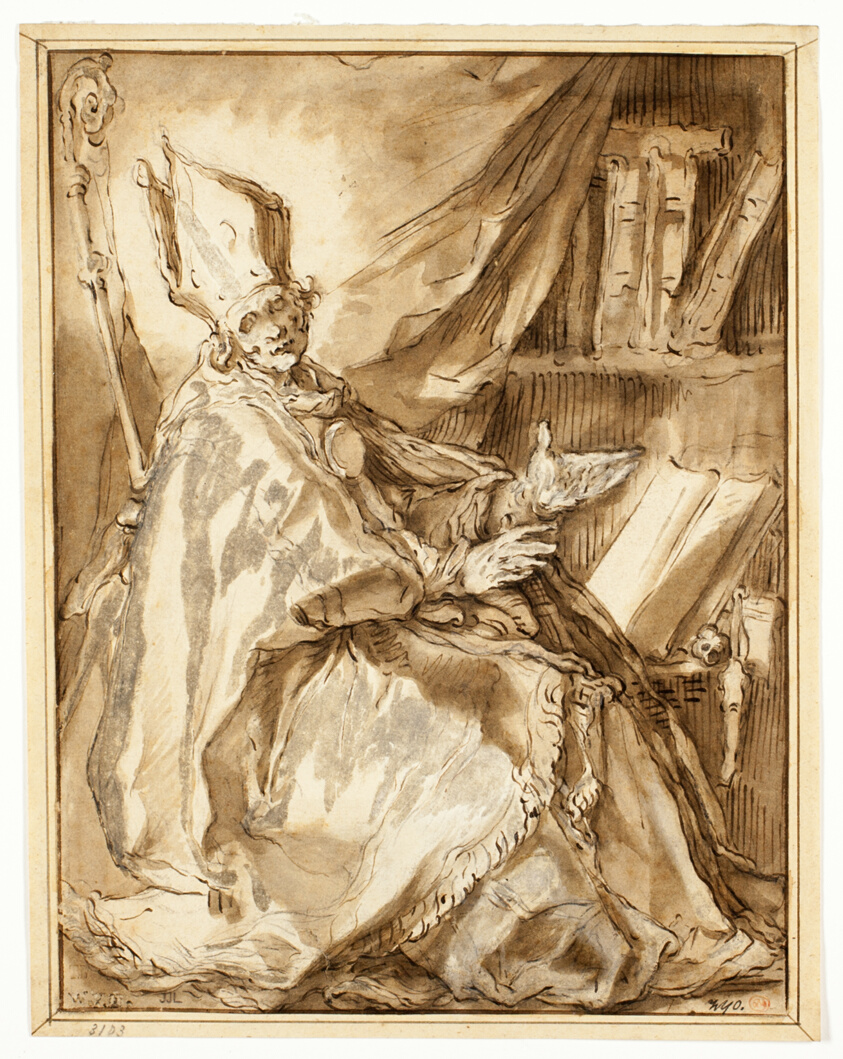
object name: Drawing and Watercolor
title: Bishop seated in his Study, seen from his Right Side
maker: After Abraham Bloemaert; Dutch, 1566-1651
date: c. 1645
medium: Pen and brown ink and brush and brown ink wash over graphite with opaque white watercolor on cream laid paper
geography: Italy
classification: pen and ink drawings; drawings (visual works); prints and drawing